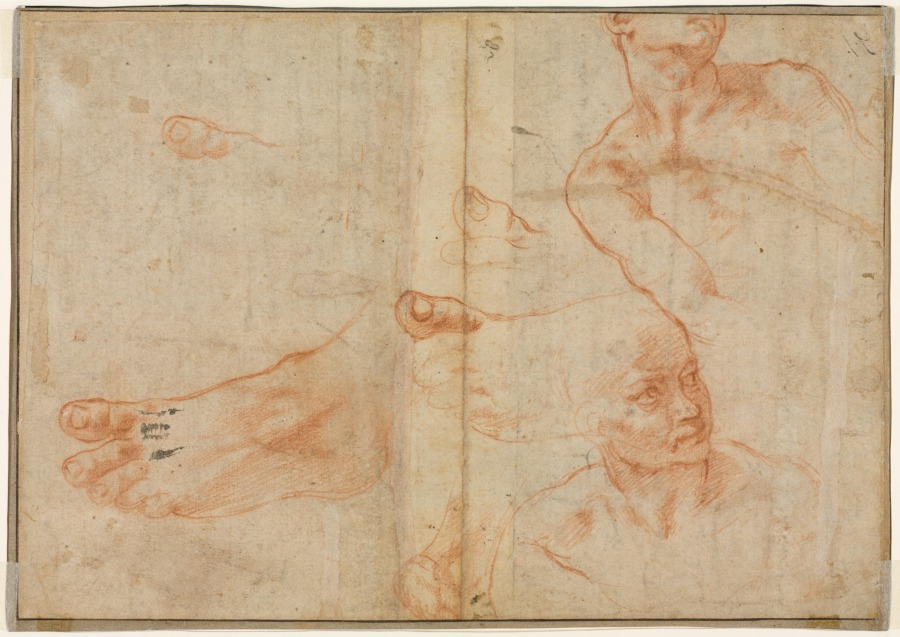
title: Figure Studies for the Sistine Ceiling (verso)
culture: Italy, 16th century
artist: Michelangelo Buonarroti (Italian, 1475–1564)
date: 1510–11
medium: red chalk heightened with traces of white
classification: Drawing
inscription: upper center, in brown ink: 82 (?); upper right, in brown ink: V./.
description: Universally considered one of the greatest artists of the Italian Renaissance, Michelangelo devoted four years to painting the vast ceiling fresco in the Sistine Chapel. This preparatory study portrays one of the 20 athletic male nudes, known as ignudi, who serve as supporting figures at each corner of the Old Testament scenes painted down the center of the ceiling. Michelangelo worked out the positioning of the ignudi in red chalk drawings before beginning to paint each section of wet plaster. The energy and monumentality of the figure in red chalk, whose body extends beyond the sheet, suggests the heroic athleticism of Michelangelo’s sculpture.